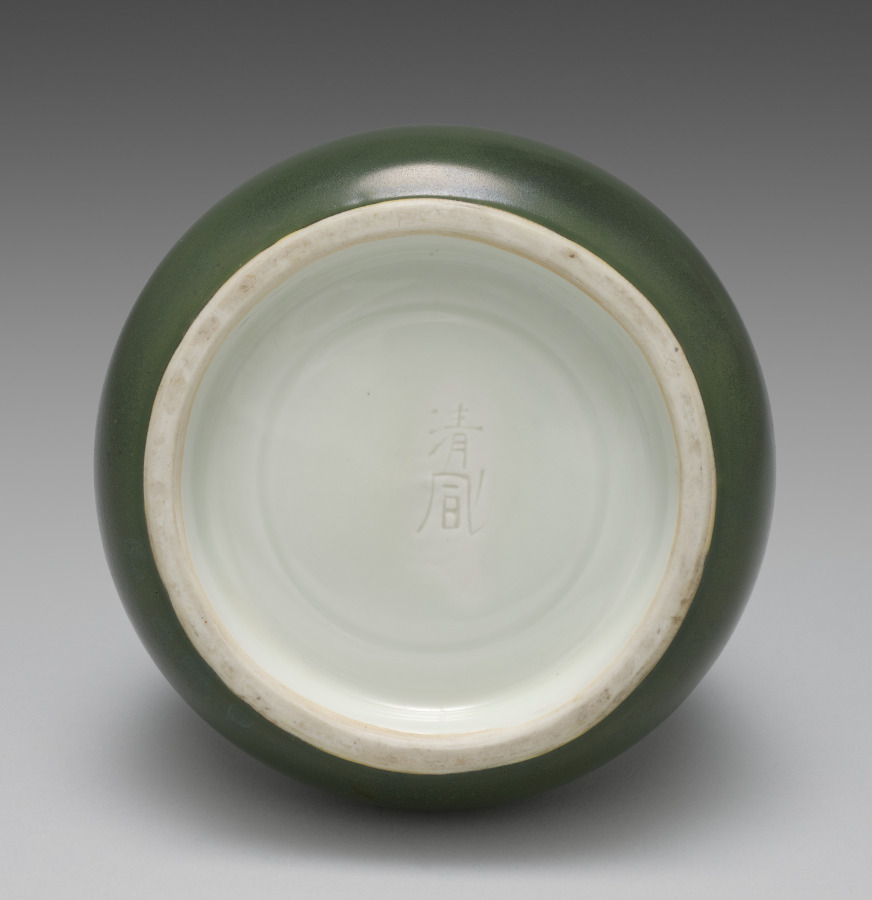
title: Flower Vase with Floral Scroll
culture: Japan, Meiji period (1868–1912)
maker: Seifū Yohei III (Japanese, 1851–1914)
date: 1893–1914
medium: Porcelain with underglaze colors and green glaze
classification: Ceramic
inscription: 清風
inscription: 帝室技芸員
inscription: 金聲玉振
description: The upper part of this vase is painted in underglaze blue with a floral scroll of leaves accentuated with a single chrysanthemum motif on each face and bound at top and bottom with single blue lines. The box lid for the vase is short on detail; the inscription notes only that it is a flower vase with underglaze blue. It is possible that the box is a mismatch because the inscription does not mention the vase’s more distinctive feature: the deep green glaze on its lower half, which is seen much less frequently among Yohei III’s works. This glaze may be an example of a dark green porcelain glaze called rōkanji, which the artist invented in 1892. The name of the glaze comes from Chinese, in which it is pronounced langgan. It may literally mean “tinkling sound of jade” and could refer to malachite, among other proposed identifications.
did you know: The center of each chrysanthemum has a crescent-shaped design at the top filled with a very pale yellow wash under the transparent glaze.